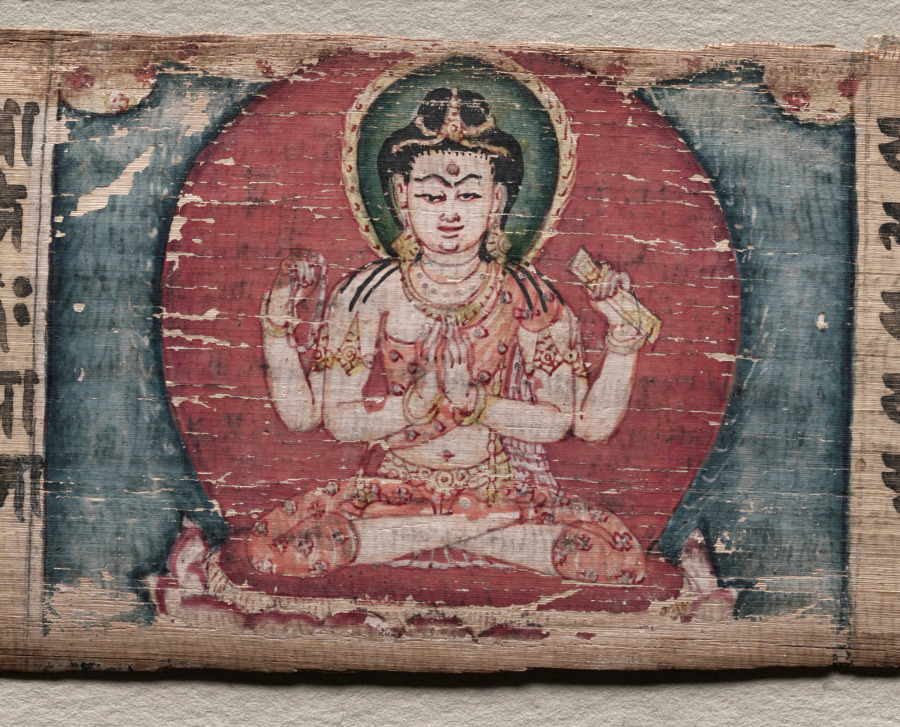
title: Bodhisattva Manjushri with two forms of Avalokiteshvara, folio 348 (recto) from a Gandavyuha-sutra (Scripture of the Supreme Array)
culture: Nepal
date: 1000–1100s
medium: gum tempera and ink on palm leaf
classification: Painting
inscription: >> dharmamukhānyavakrāntānyabhūvan nānānayaiḥ // atha khalu samantabhadro bodhisattvo mahāsattvaḥ sudhanaṃ śreṣṭhidārakametadavocat - dṛṣṭaṃ te kulaputra mama vikurvitam? āha - dṛṣṭamārya / api tu tathāgataḥ prajānan prajānīyāttāvadacintyamidaṃ vikurvitam / so 'vocat - ahaṃ kulaputra anabhilāpyānabhilāpyabuddhakṣetraparamāṇurajaḥsamān kalpān vicaritaḥ sarvajñatācittamabhilaṣamāṇaḥ / ekaikasmiṃśca mahākalpe 'nabhilāpyānabhilāpyabuddhakṣetraparamāṇurajaḥsamāstathāgatā ārāgitā bodhicittaṃ pariśodhayatā / ekaikasmiṃśca mahākalpe sarvatyāgasamāyuktāḥ sarvalokavighuṣṭā mahāyajñā yaṣṭāḥ / sarvasattvapratipādanā sarvajñatāpuṇyasaṃbhāratā / ekaikasmiṃśca mahākalpe anabhilāpyānabhilāpyabuddhakṣetraparamāṇurajaḥsamāstyāgā (Gv 426) mahātyāgāḥ kṛtāḥ, atyarthatyāgāḥ kṛtāḥ sarvajñatādharmānabhiprārthayatā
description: The Bodhisattvas of Wisdom and Compassion sit in majesty, with Manjushri in the preaching gesture in the center, being honored by two worshipers. His mandorla dances with flames, and tongues of flames encircle its border. Two different forms of Avalokiteshvara are in the flanking paintings, a two-armed and a four-armed form.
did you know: A book on a blue lotus is just over the left shoulder of the Bodhisattva of Wisdom, Manjushri.